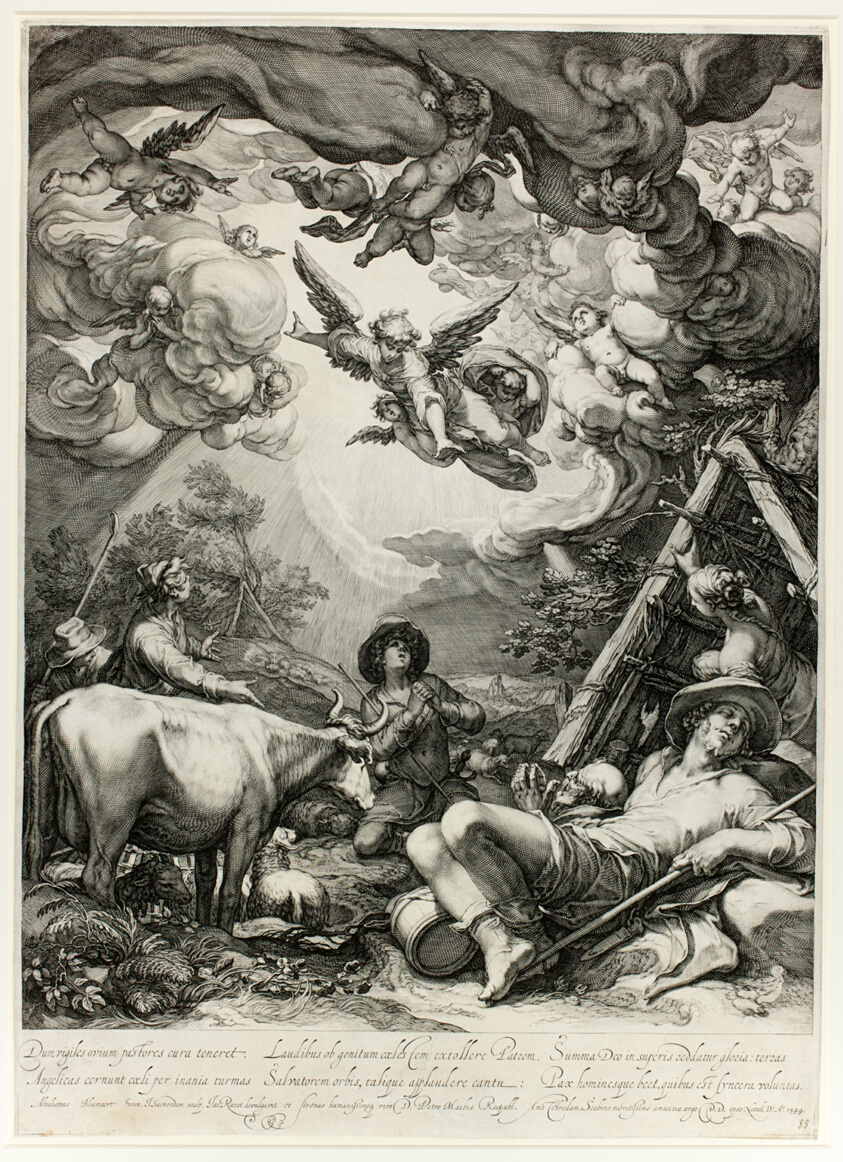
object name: Print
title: The Annunciation to the Shepherds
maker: Jan Saenredam (Dutch, 1565-1607); after Abraham Bloemaert (Dutch, 1566-1651)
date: 1599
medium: Engraving on ivory laid paper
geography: Holland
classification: engraving; print; prints and drawing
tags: crowns, Christian subjects, mythology, prints and drawings, shepherds